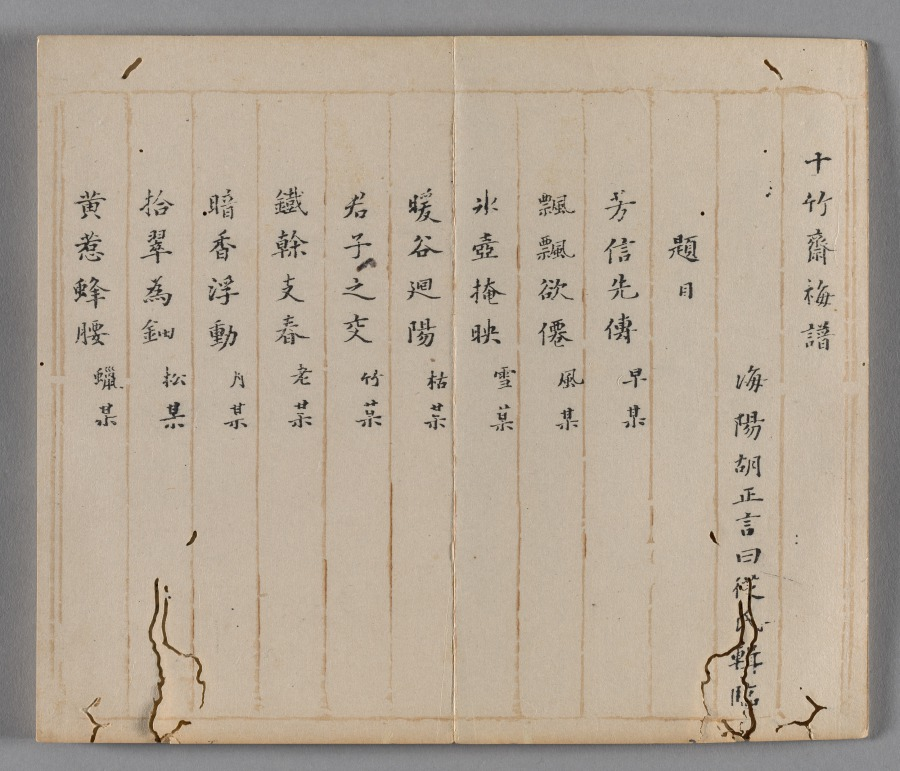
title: Ten Bamboo Studio Painting and Calligraphy Handbook (Shizhuzhai shuhua pu): Plum Blossoms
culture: China, Qing dynasty (1644-1911)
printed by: Hu Zhengyan (Chinese, c. 1584–1674)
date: 1633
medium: Woodblock-printed book; ink and colors on paper; first edition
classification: Print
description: Color printing reached a level of perfection in the early 1600s, as seen in this Ten Bamboo Studio Collection of Calligraphy and Painting and the Mustard Seed Garden Manual of Painting (printed 1679 and 1701). The painterly quality, precision in registering (aligning) the woodblocks, and harmonious colors made them the most successful color print editions in Chinese history. Both editions were printed and compiled in Nanjing, spread nationwide, and had a great impact on the arts in Japan and Korea.